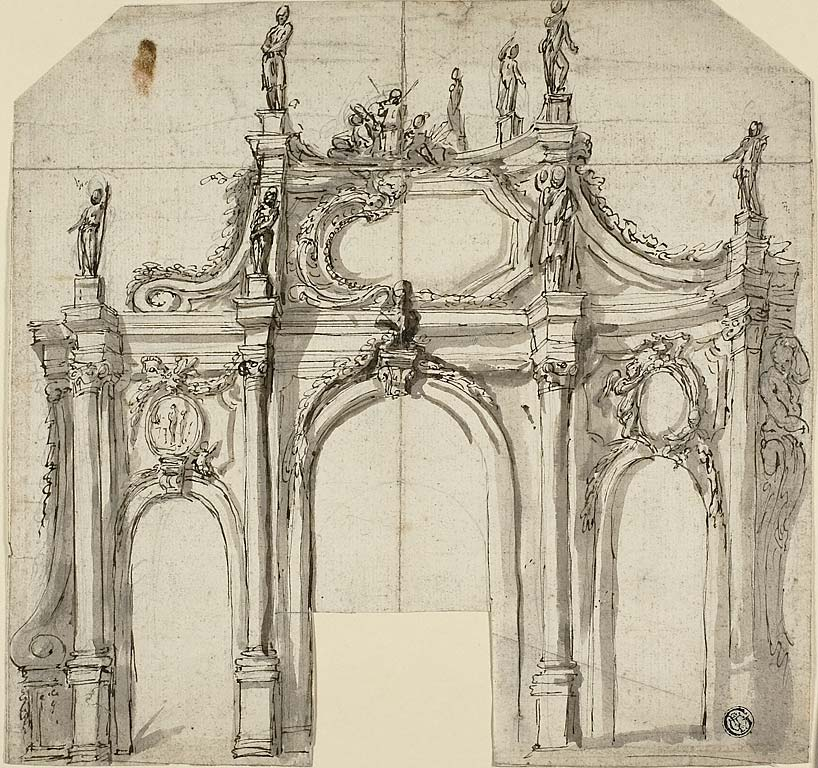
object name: Drawing and Watercolor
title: Triumphal Arch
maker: Unknown Artist (Italian, 17th century); possibly Agostino Mitelli (Italian, 1609-1660)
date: 1600/99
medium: Pen and brown ink with brush and brown wash, over graphite, on ivory laid paper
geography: Italy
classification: pen and ink drawings; drawings (visual works); prints and drawing